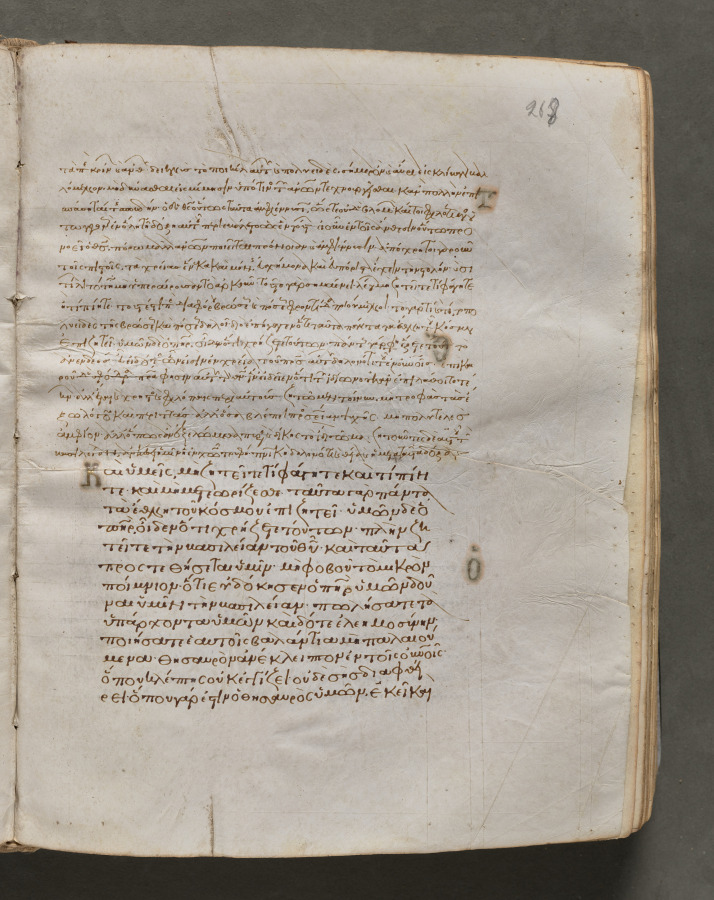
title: Text, folio 268 (recto), from a Gospel Book with Commentaries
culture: Byzantium, Constantinople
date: c. 1000–1100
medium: ink, tempera, and gold on vellum; leather binding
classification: Bound Volume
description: Each of the four gospels in this book opens on a page with brilliantly illuminated borders depicting the author of the text as well as birds—principally peacocks, symbols of the immortality of the soul—and fountains, representing the fountain of life and the salvation of the soul. This volume consists of 428 leaves with texts in Greek. Its level of sophistication suggests that it was probably written and decorated in a monastery in Constantinople.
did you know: Gospel books were carried in procession through Byzantine churches.